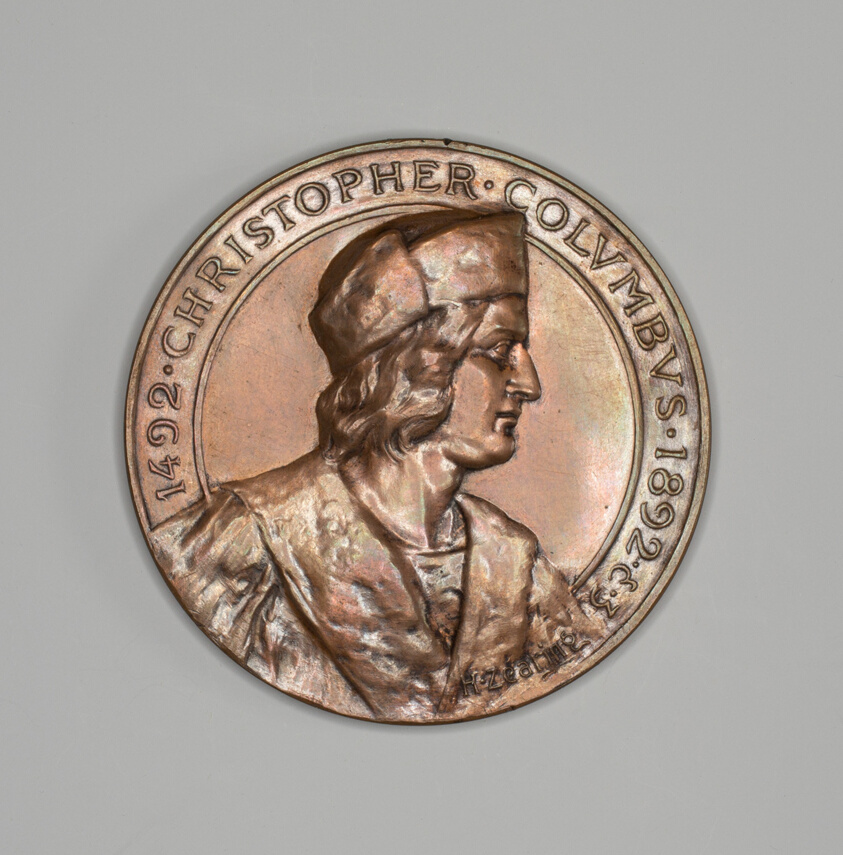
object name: Metalwork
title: Two Medals Depicting Columbus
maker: Artist unknown (American, 19th century)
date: 1892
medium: Bronze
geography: United States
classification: medal; american arts; decorative arts